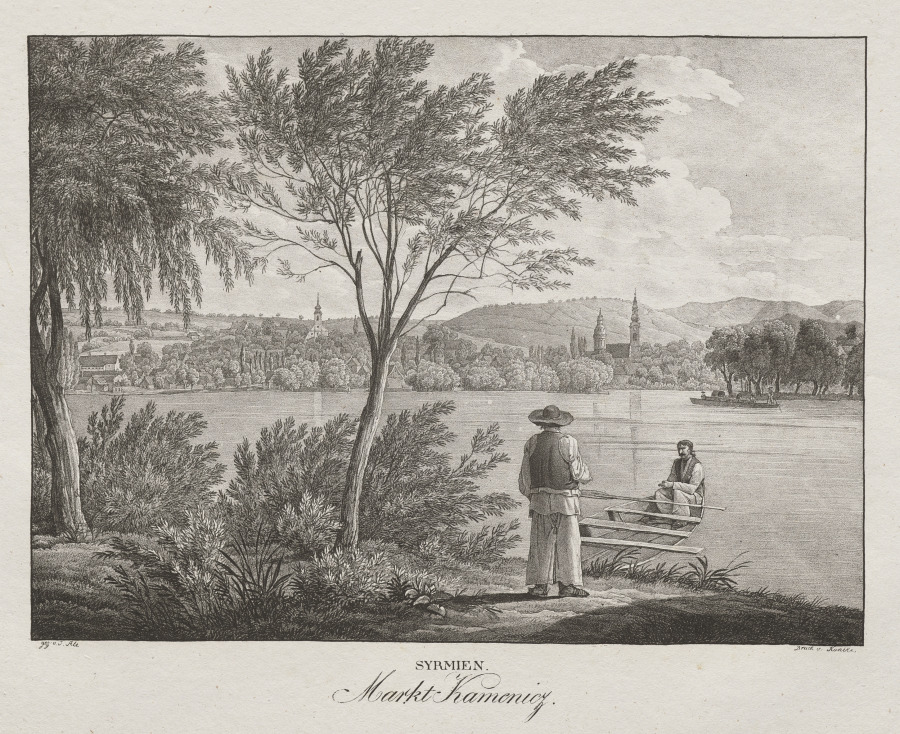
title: Syrmien, Markt Kamenicz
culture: Austria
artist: Jakob Alt (Austrian, 1789–1872)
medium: lithograph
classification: Print